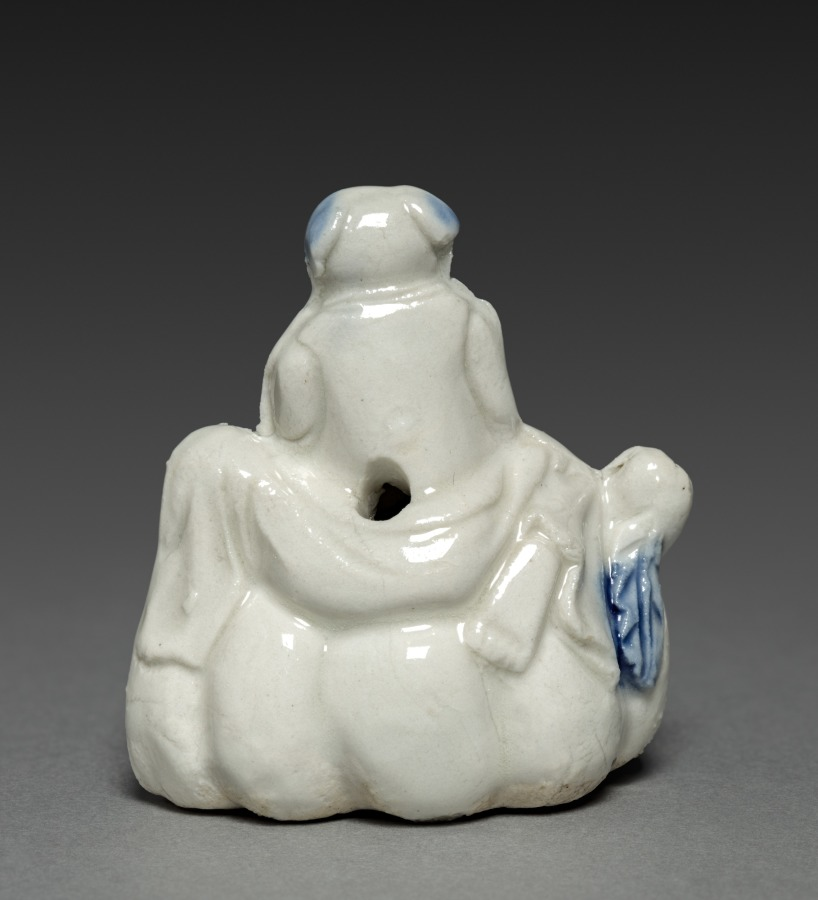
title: Waterdropper in Shape of Chinese Boy Seated on a Gourd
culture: Japan, Edo period (1615–1868)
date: 1700s to mid-1800s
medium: porcelain, molded and carved, with underglaze blue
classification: Ceramic